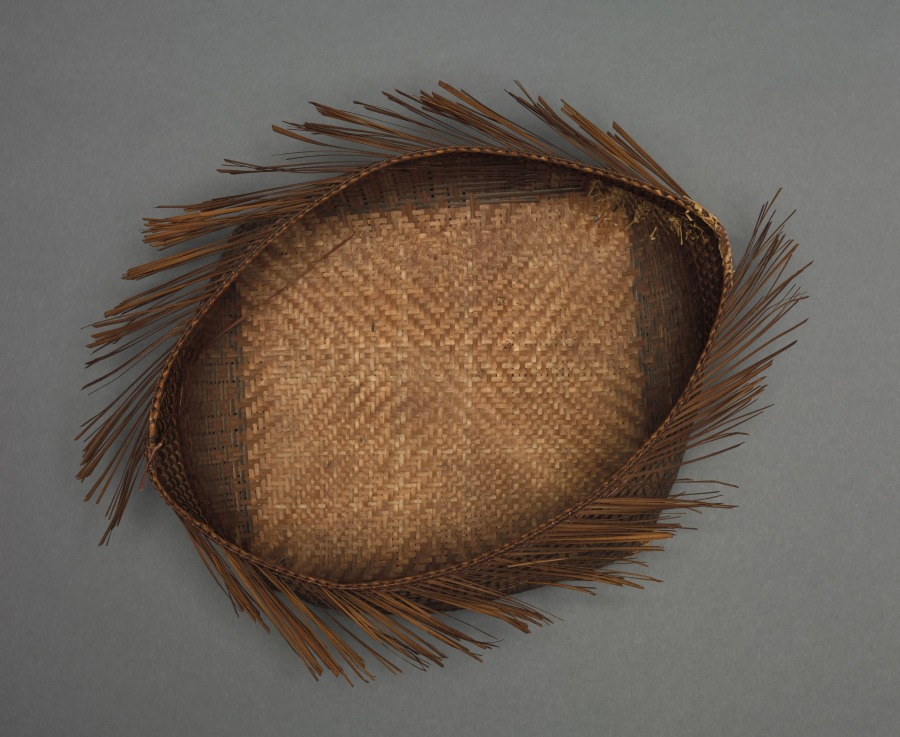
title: Hat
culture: Africa, Central Africa, Democratic Republic of the Congo, Mangbetu-style maker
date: before 1929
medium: Plant fibers and dye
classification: Garment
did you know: This woven hat looks brand new because it was one of the many items the business-savvy chief of Ekibondo had artists and artisans make for the foreigners who passed through his village.